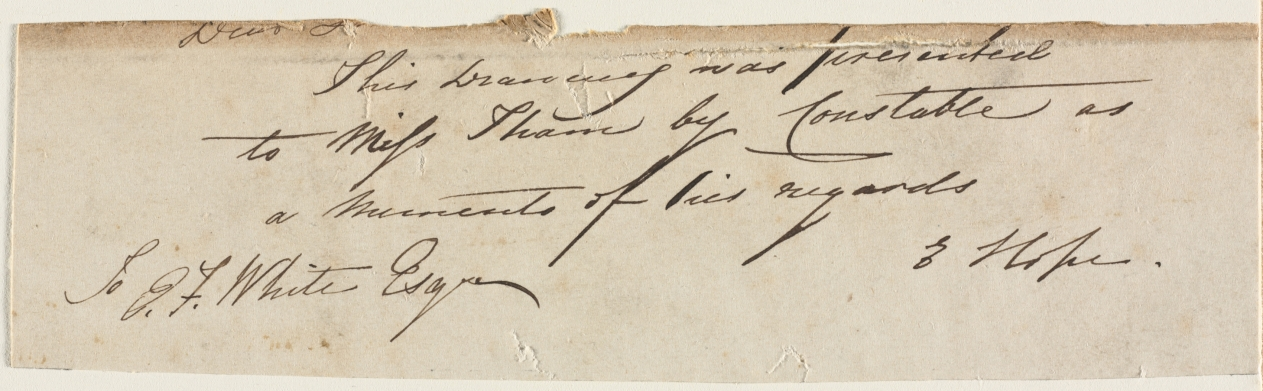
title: Landscape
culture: England, 19th century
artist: John Constable (British, 1776–1837)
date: c. 1796–1837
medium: watercolor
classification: Drawing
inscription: Inscribed on verso: "This drawing was presented to Miss Tham by Constable as a memento of his regards"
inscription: inscribed on verso: "E. Hope to E.F. White Esq."